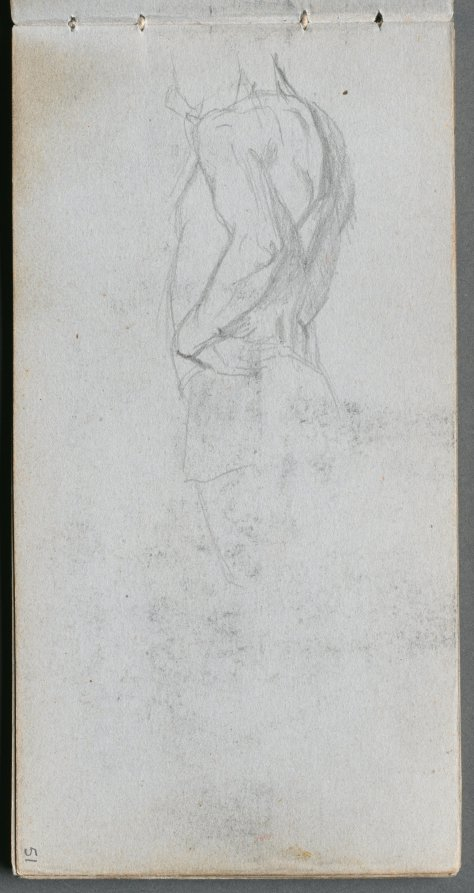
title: Sketchbook, page 51: Figure Study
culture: France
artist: Ernest Meissonier (French, 1815–1891)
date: c. 1860s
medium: graphite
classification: Bound Volume